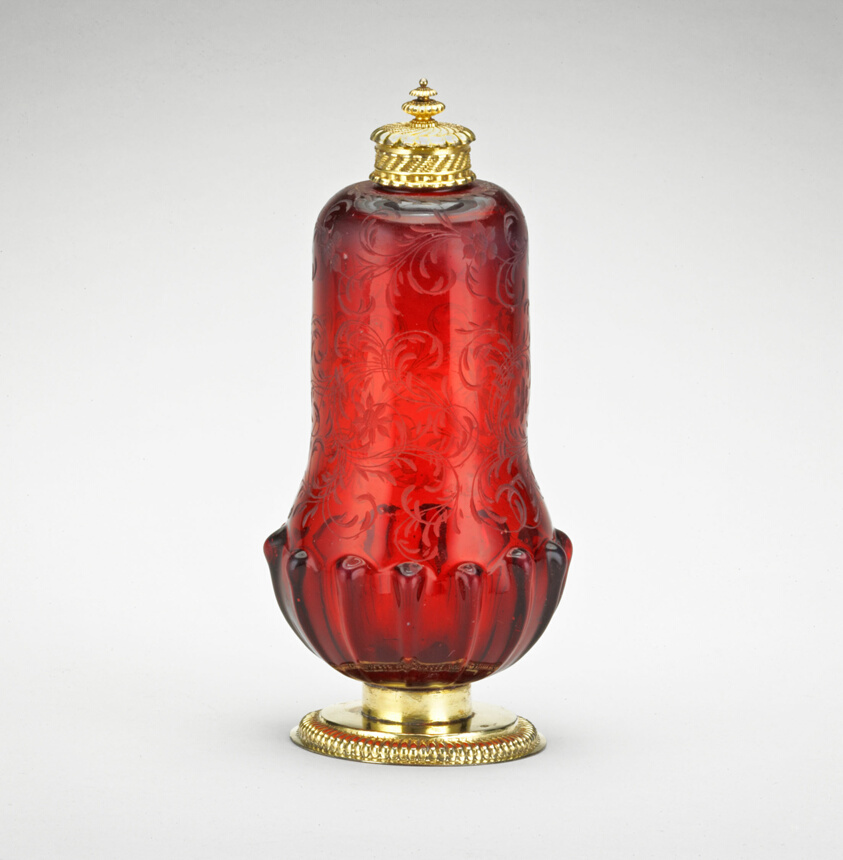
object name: Glass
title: Sugar Caster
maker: Silversmith: Elias Adam (German, 1669-1745); Potsdam, Germany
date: 1690/1700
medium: Ruby glass with silver-gilt mounts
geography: Potsdam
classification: glass; european decorative arts